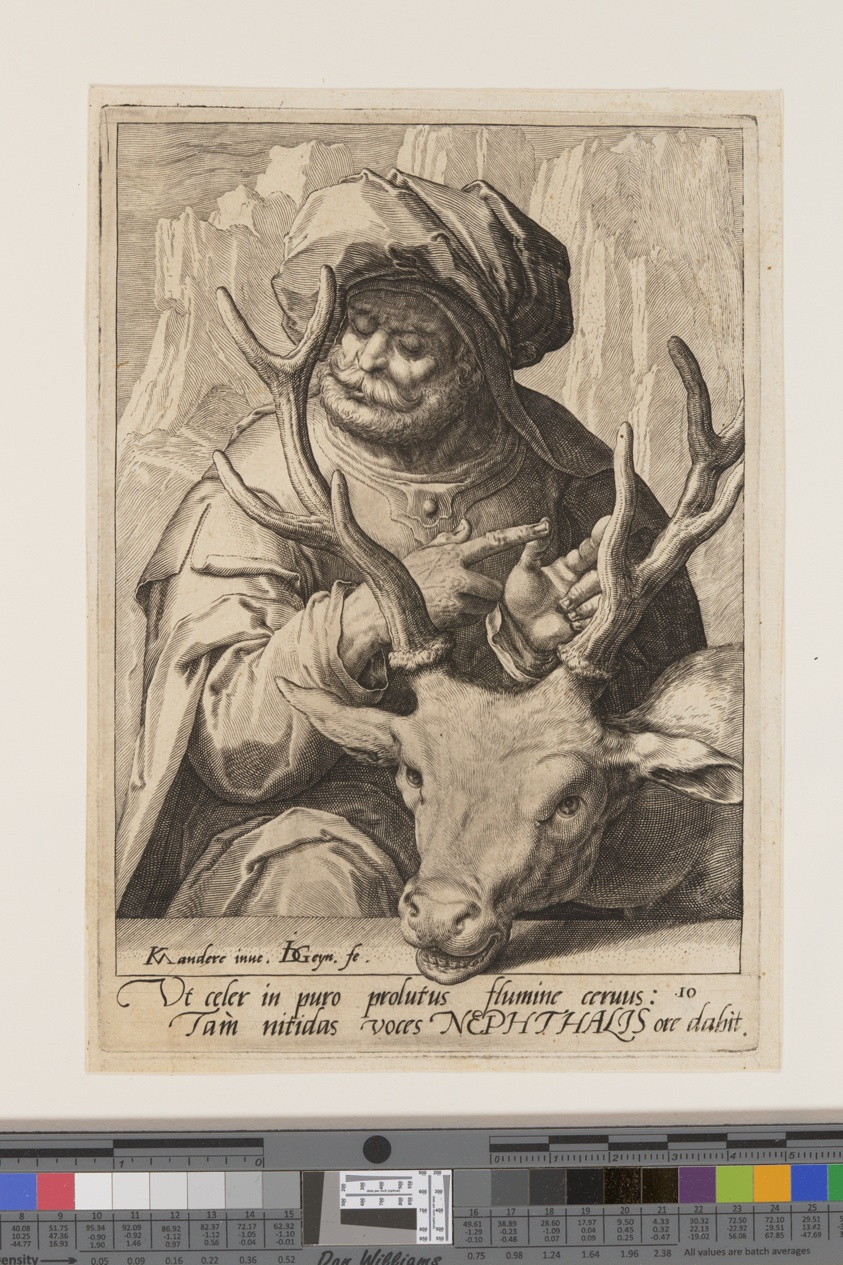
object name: Print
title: Naphthali, from The Twelve Sons of Jacob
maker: Jacques de Gheyn II (Dutch, 1565–1629); after Karel van Mander (Dutch, 1548–1606)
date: c. 1589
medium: Engraving on ivory laid paper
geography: Netherlands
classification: engraving; paper; print; prints and drawing